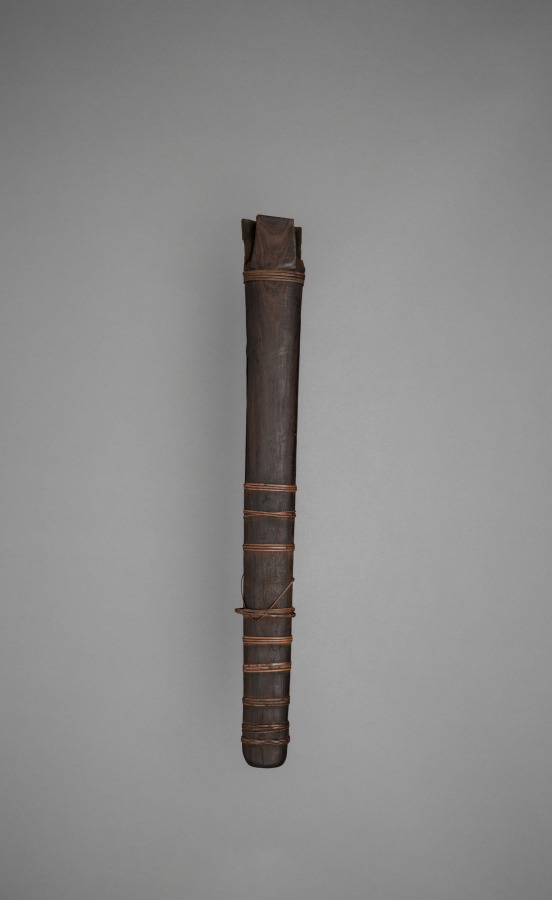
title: Scabbard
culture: Philippines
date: before 1918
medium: Wood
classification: Arms and Armor